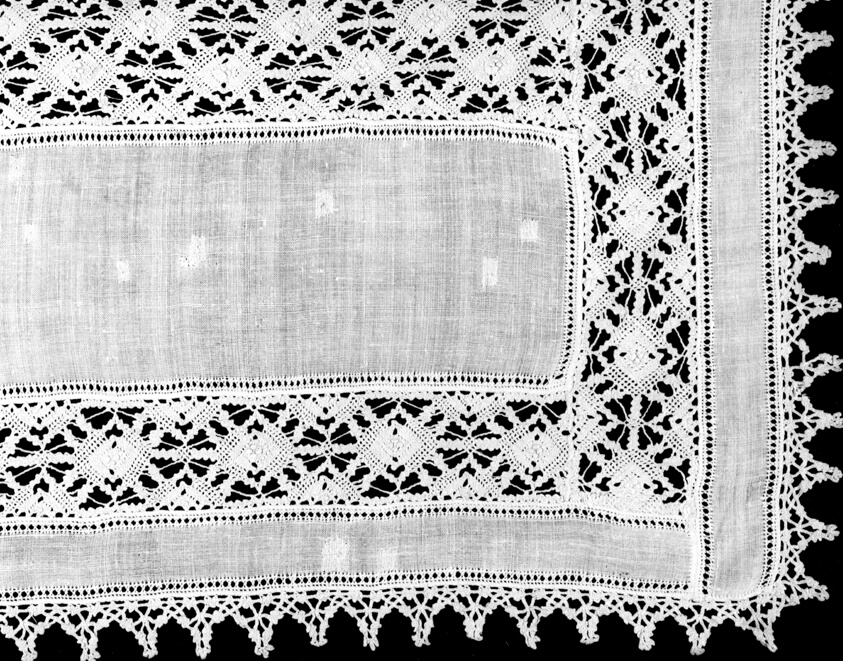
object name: Textile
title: Cover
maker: Italy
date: 1875/1900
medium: Linen, plain weave; cut and drawn work embroidered in hem and Italian hem stitches; with insertion and edging of bobbin straight lace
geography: Italy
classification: textile; lace - bobbin